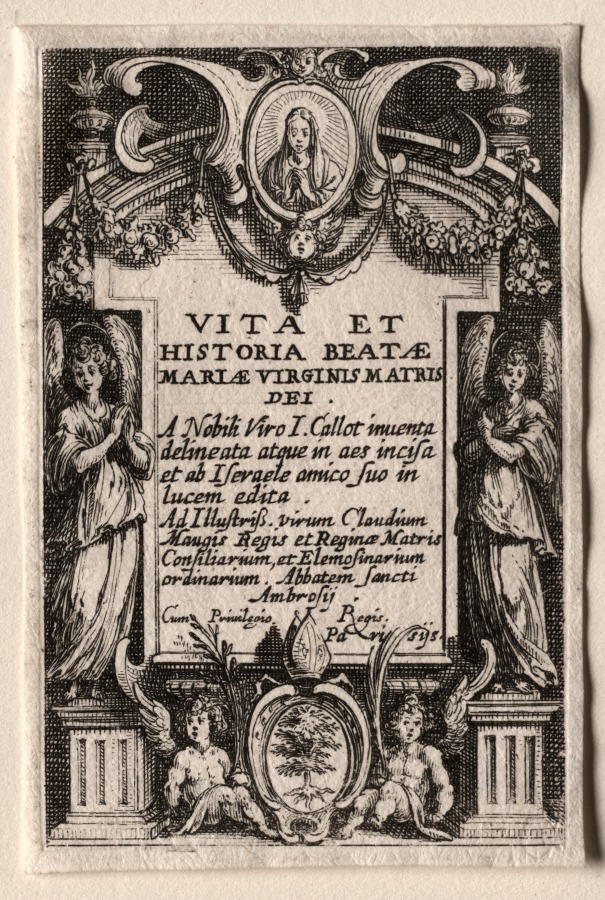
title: The Life of the Virgin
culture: France, 17th century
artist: Jacques Callot (French, 1592–1635)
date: ca. 1633–34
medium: etching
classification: Print